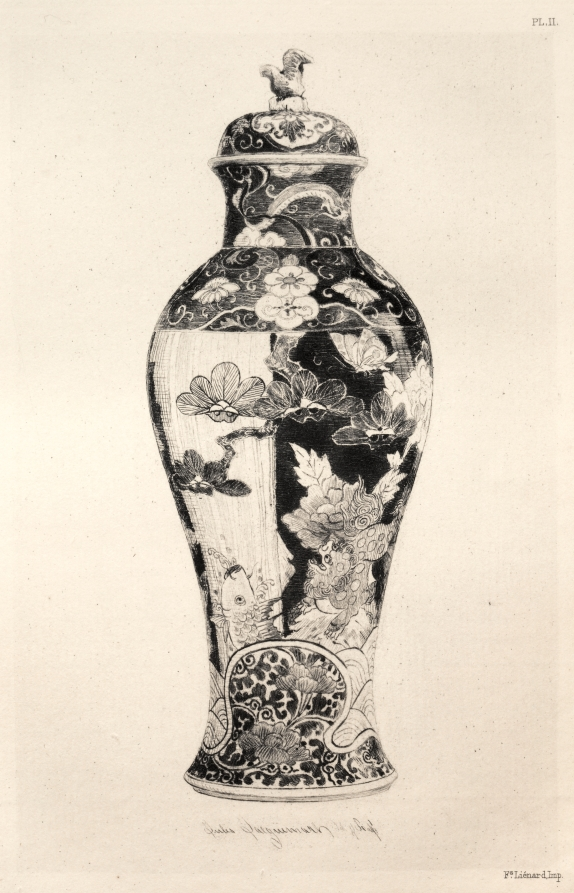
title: History of the Ceramic Art: A Descriptive and Philosophical Study of the Pottery of All Ages and All Nations: Japan: Chrysanthemo-Paeonian Family. -Jar, "Potiche," with the Dog of Fo, and a Carp Leaping Out of the Water (Plate III)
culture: France, 19th century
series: Book by Albert Jacquemart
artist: Jules Jacquemart (French, 1837–1880)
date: 1877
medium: etching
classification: Bound Volume